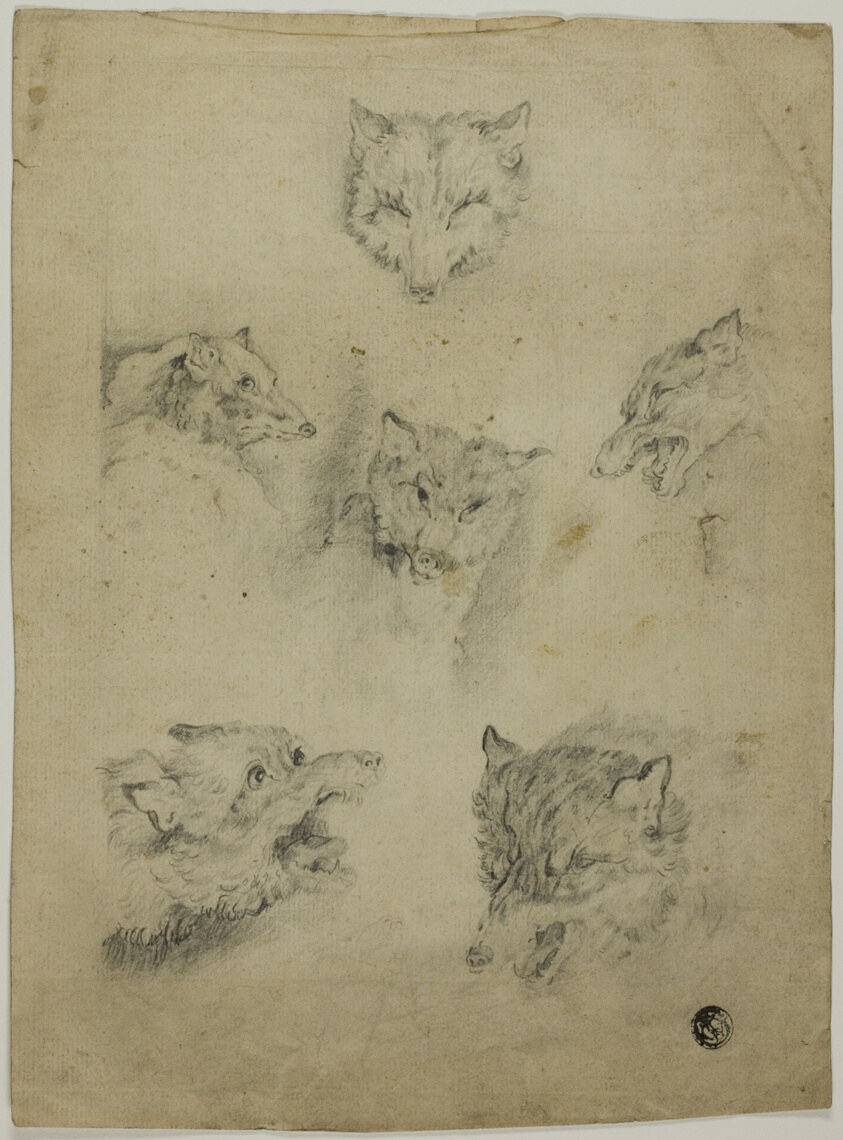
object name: Drawing and Watercolor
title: Six Sketches of Wolf Heads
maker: Unknown Artist; European, n.d.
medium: Graphite on tan laid paper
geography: Europe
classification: graphite; drawings (visual works); prints and drawing